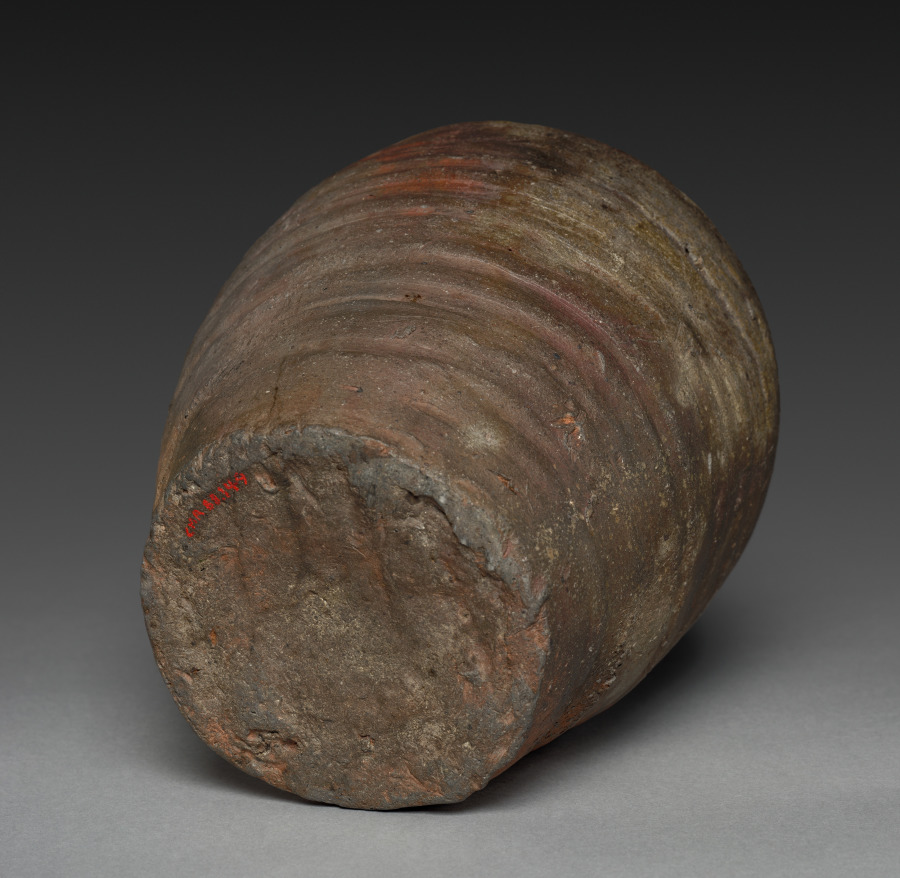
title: Storage Jar: Bizen Ware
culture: Japan, Muromachi period (1392–1573)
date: late 1400s-early 1500s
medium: stoneware with natural ash glaze, incised comb pattern, and incised potter's mark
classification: Ceramic